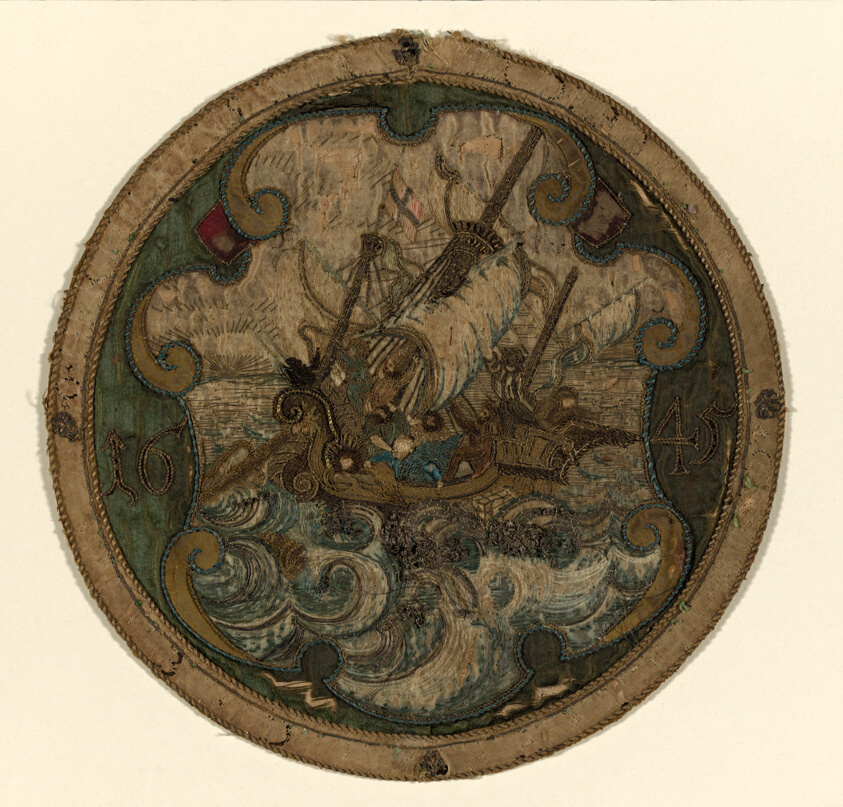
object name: Textile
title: Fisherman's Shield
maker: Germany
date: 1645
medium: Silk, satin weave; embroidered with silk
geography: Germany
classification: textile; needlework (visual works)